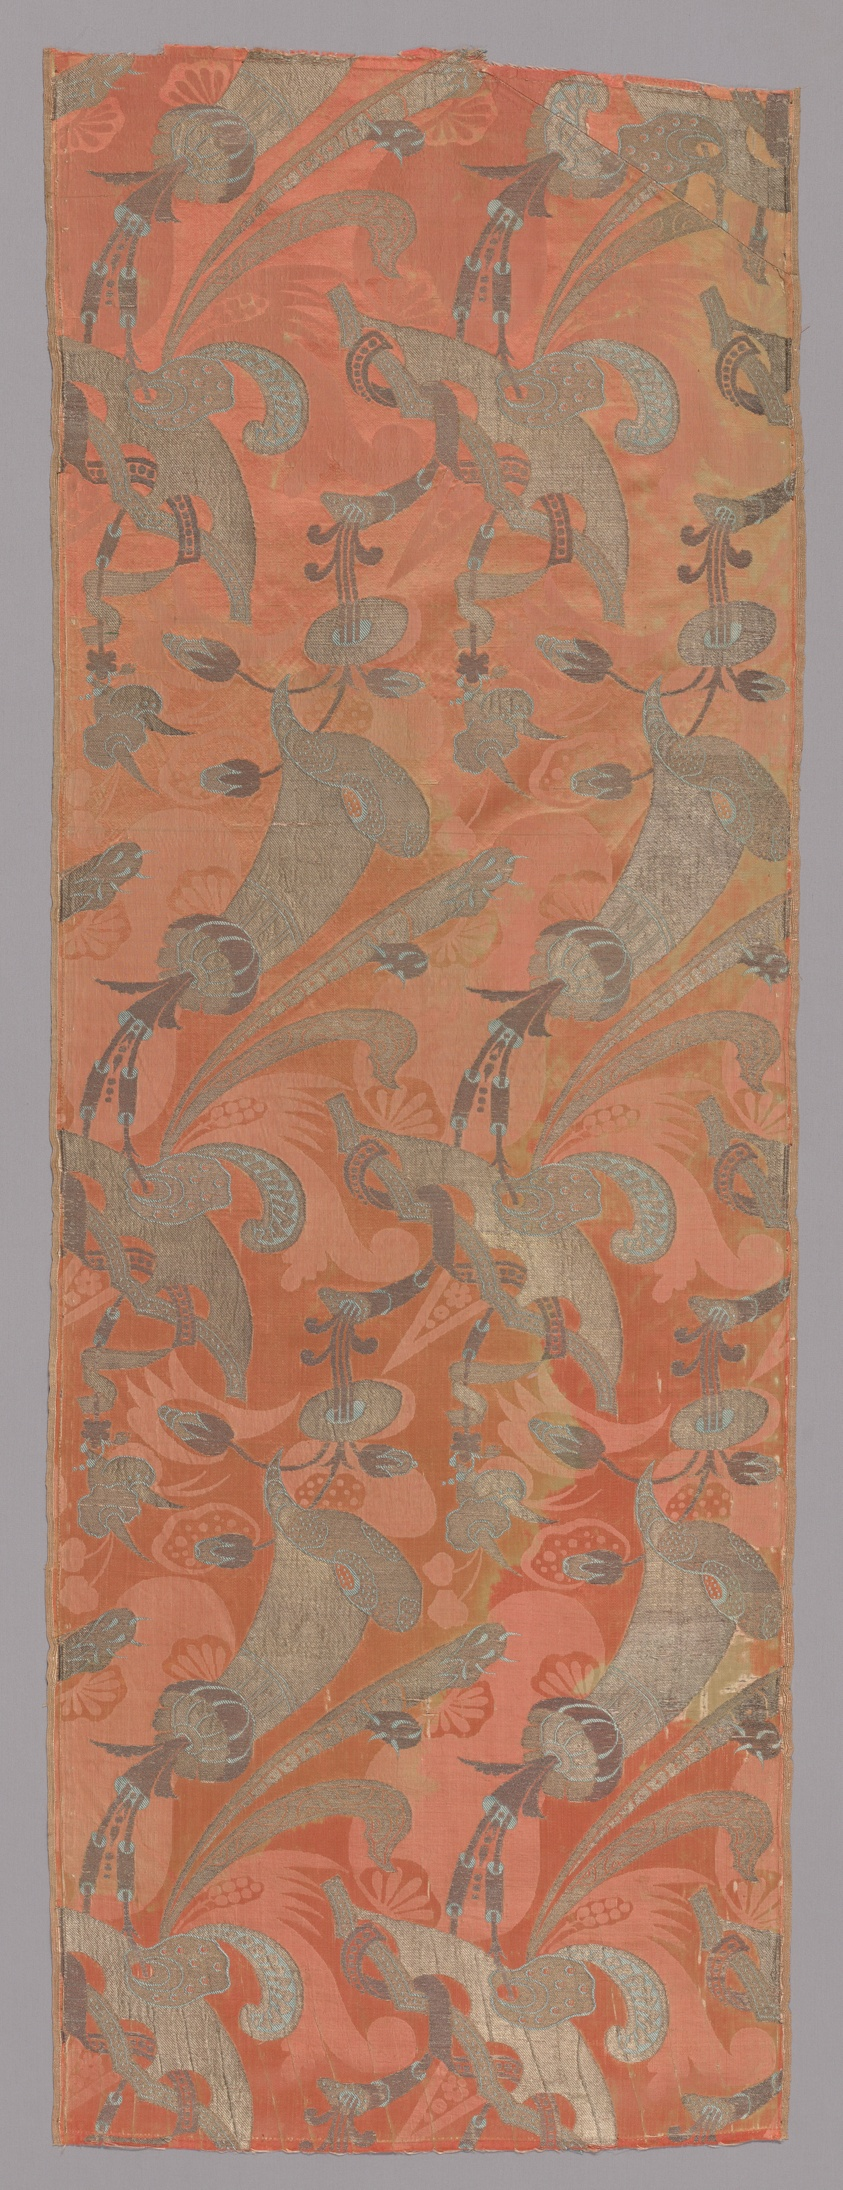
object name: Textile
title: Length of Woven Silk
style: "bizarre" style, 18th Century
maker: France or Italy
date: 1700–1705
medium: Silk and gilt- and silvered-metal-strip-wrapped silk, satin weave with brocading wefts and self-patterning ground wefts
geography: France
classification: weaving; textile; silk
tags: flowers, garlands, gold (color), floral motifs, floral, foliage, abstract shapes